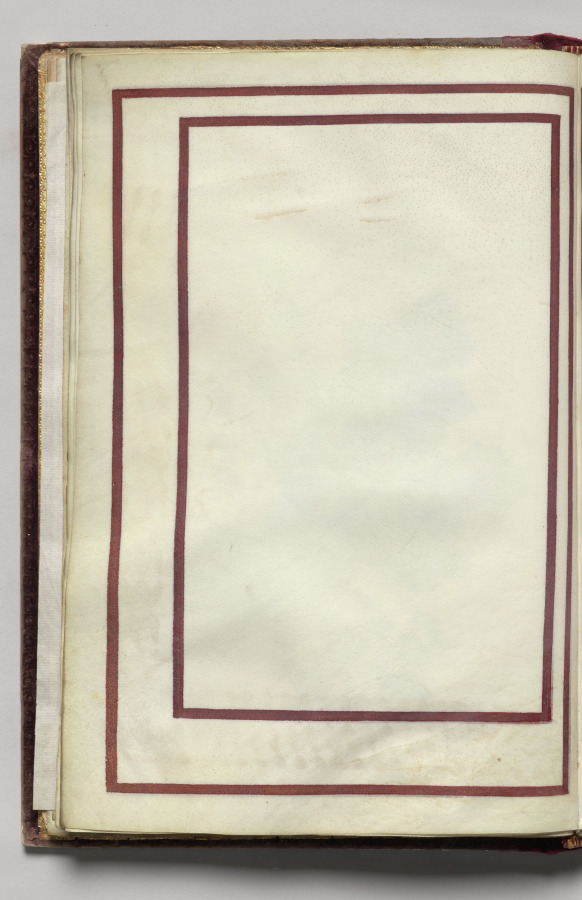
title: Border, folio 11 (verso), from Florilegium (A Book of Flower Studies)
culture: France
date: 1608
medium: watercolor, ink, silver and gold over occasional traces of pencil, on vellum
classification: Bound Volume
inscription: Dated: Poitiers 1608 (on frontispiece) Signed: On frontispiece in black ink, lower right: Van Kuyk Notation on drawing: Frontispiece: in pencil, lower margin: * élève de Van Kessel, peintre flammand (* in pencil also appears in front of Van Kuyk's name).